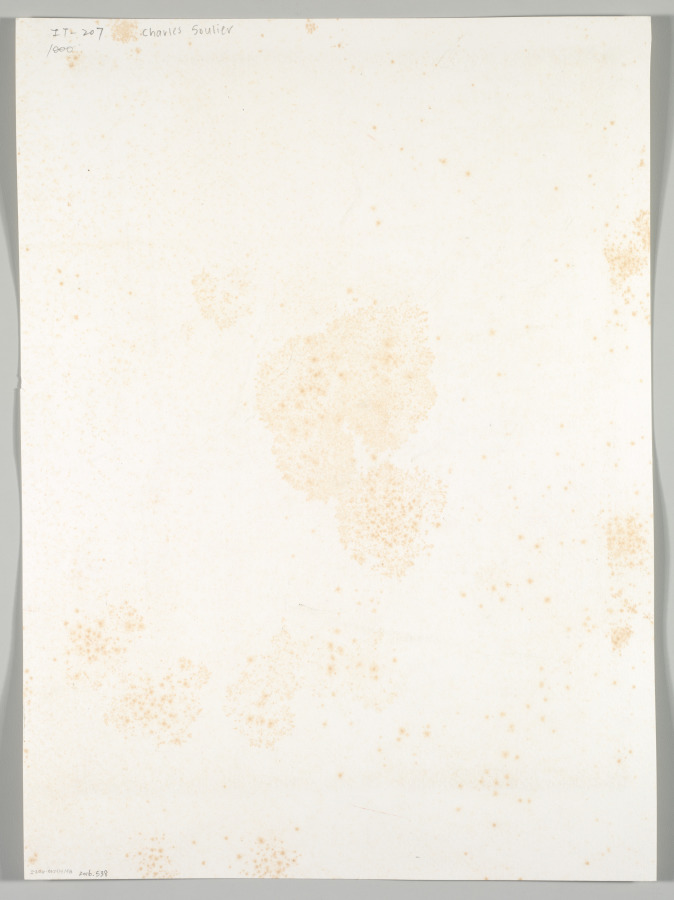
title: Silenus Holding the Child Dionysus, Louvre Museum, Paris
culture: France, 19th century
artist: Charles Soulier (French, 1830–1900)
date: c. 1860s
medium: albumen print from collodion negative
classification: Photograph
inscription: Imprinted in black type on recto of mount: “Photograpié d’après nature par CH. SOULIER/PHOTOGRAPHE DE L’EMPEREUR/ROME” Written in pencil on recto of mount: “Collection André Jammes” Written in pencil on verso of mount: “IT-207 Charles Soulier/1000”